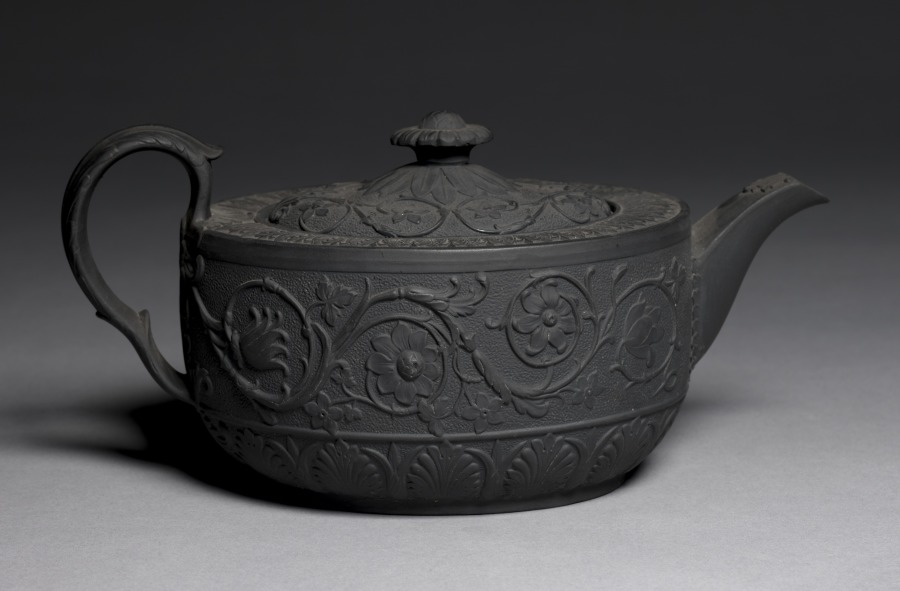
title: Pair of Teapots and Creamer Set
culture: England, 19th century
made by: Elijah Mayer & Son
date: c. 1810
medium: black basalt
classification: Ceramic